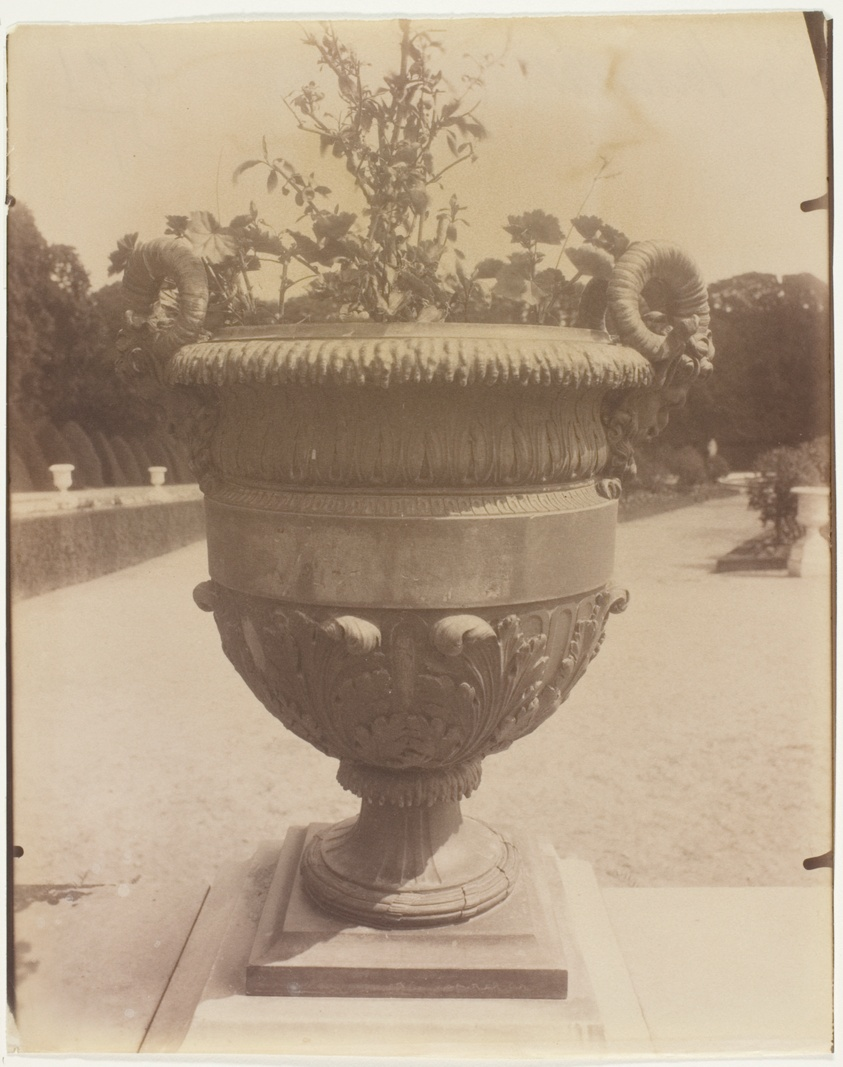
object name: Photograph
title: Versailles, Vase par Ballin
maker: Jean-Eugène-Auguste Atget (French, 1857–1927)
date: 1905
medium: Albumen print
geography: France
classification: albumen silver print; photographic process; photography; photograph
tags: Collected by Hugh Edwards